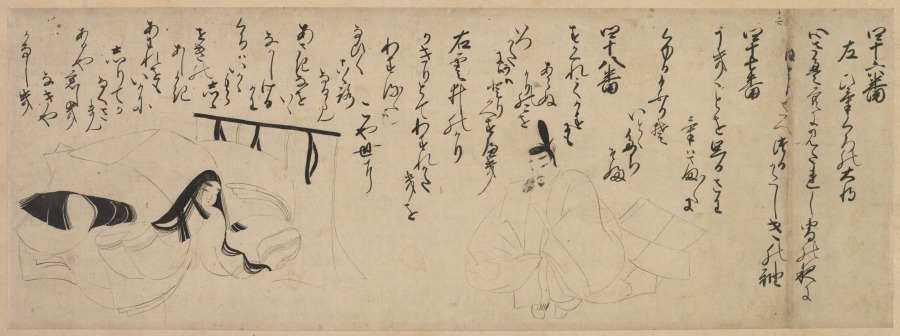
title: Section of an Illustrated Tale of Genji Poetry Contest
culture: Japan, Muromachi period (1392–1573)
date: 1400s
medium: section of a handscroll mounted as a hanging scroll; ink on paper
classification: Painting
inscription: 四十六番 左 ひげくろの大将 心さえ空にみだれし雪の［も」夜に ひとりさえつるかたしきの袖／ 四十七番 うきことを思ひさわ げばさまざまに くゆるけむりぞ いとど たち そふ／ 四十八番 すがくれてかず にも あらぬ かりのこを いづかたにかはとりかくすべき／ 右 雲井のかり かぎりとてわすれがたきを わするるも こや世に なびくこころな るらむ／ あさきなを いひ ながしける かわ ぐちは いかが もらしし せきのあらがき／ あわれをもいかに しりてか なぐさ めむ あるや 恋しき なきや かなしきに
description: This hanging scroll was once part of a handscroll depicting a waka (thirty-one syllable verse) poetry contest between characters from the 11th-century literary classic Tale of Genji. In this section, a woman known informally as Kumoi no kari, or “Goose in Fog,” after a lovelorn line she hums in the novel, is pitted against Higekuro no taishō, or “General Blackbeard.” Three of his poems, numbered 46 to 48, from “The Handsome Pillar” chapter appear over his image. The subsequent three poems inscribed above Kumoi no kari are presented as her “responses,” and come from "The Plum Tree Branch", “New Wisteria Leaves”, and "Evening Mist" chapters.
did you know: General Blackbeard laments having smelly ash poured upon him by his angry wife in one of the poems.